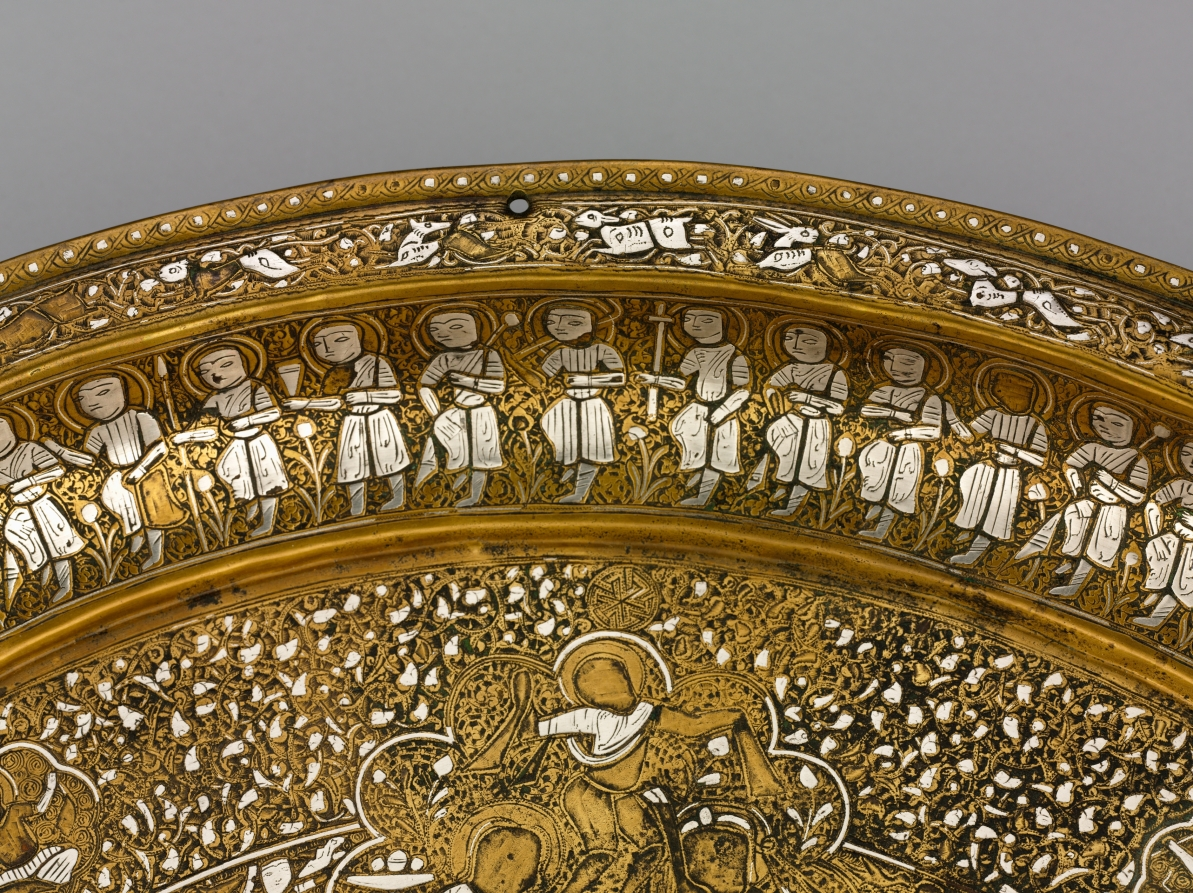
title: Tray Portraying Courtly Pleasures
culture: Syria, Ayyubid period (1171–1260)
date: 1240s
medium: sheet brass inlaid with silver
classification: Metalwork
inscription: The presence of ligatures in the narrow circular bands with interconnected human and animal figures suggests this may be a degenerate form of animated script. It is indecipherable.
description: This tray features images of courtly life interspersed with astronomical symbols. The scenes contained within large multilobed medallions display an enthroned prince with lions at his feet, a banquet, a hunt, dancers, and musicians. Contained within the concentric circles there are also references to solar and lunar motifs, including figures holding sunbursts and lunar crescents. This tray is made of a single sheet of brass and the silver inlay, which is best preserved on the tray’s inner curve, suggests its original brilliance.